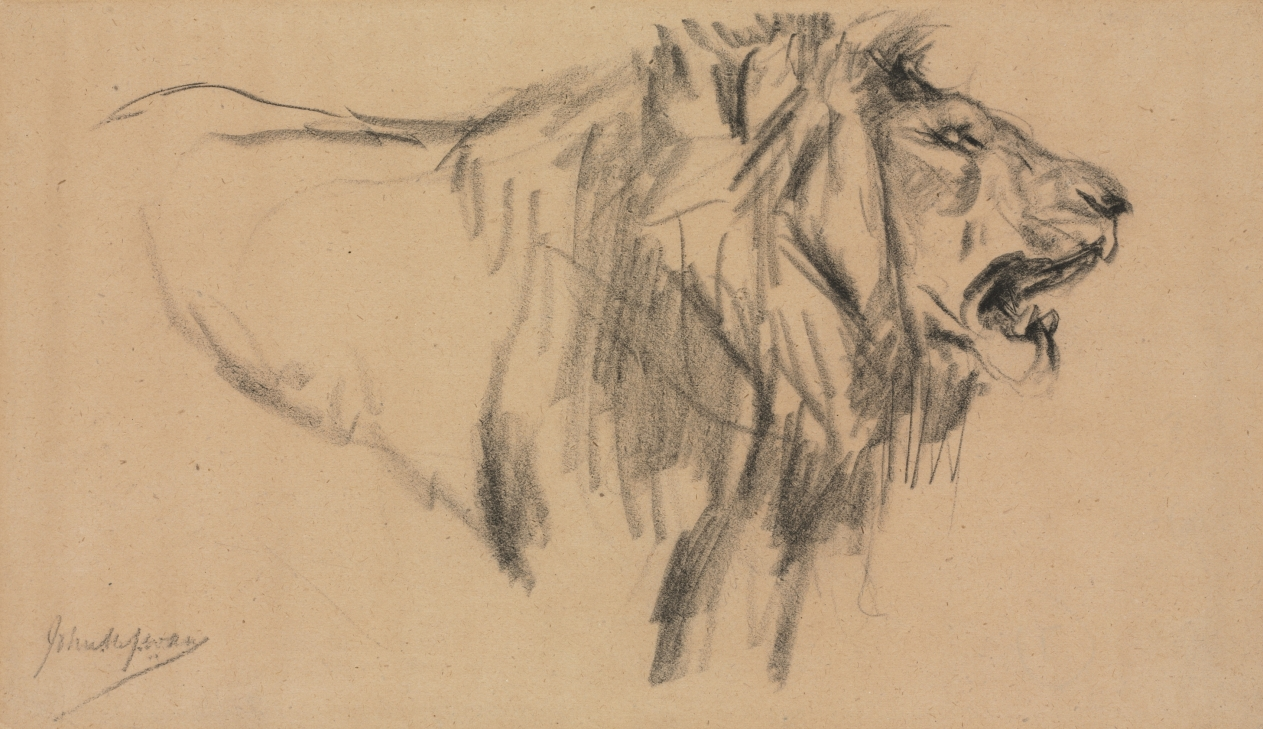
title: Lion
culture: England, 19th-20th century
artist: John Macallan Swan (British, 1847–1910)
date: c. 1867–1910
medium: charcoal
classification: Drawing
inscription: In charcoal, recto, lower left: "John M. Swan (signed)"